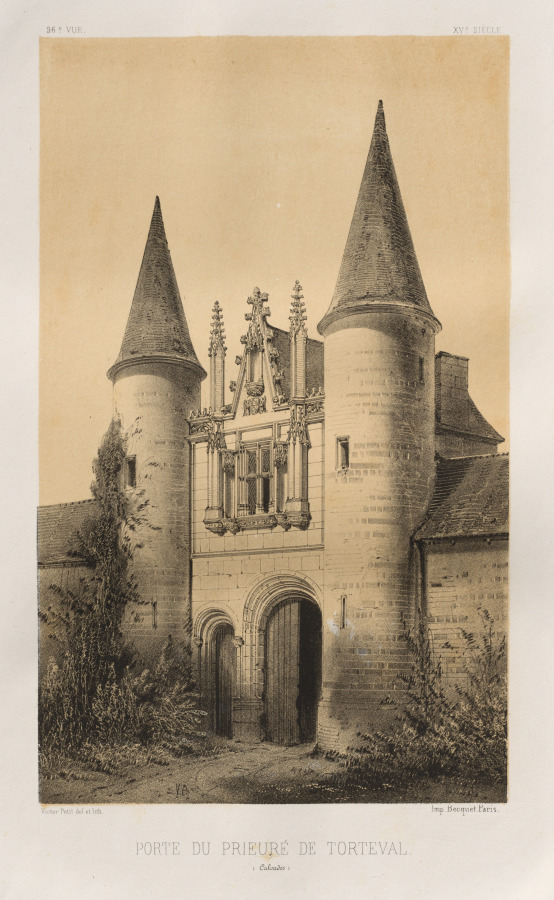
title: Architecture Pittoresque ou Monuments des XVeme. Et XVIeme. Siecles: Chateaux de France des XV et XVI Siecles: Pl. 96, Porte du Prieuré de Torteval (Calvados)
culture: France, 19th century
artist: Victor Petit (French, 1817–1874)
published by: Charles Boivin (publisher and editor); Lith de Godard a Paris (printer)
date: 1860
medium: lithograph with tint stone, from portfolio of 100 lithographs with tint stone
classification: Print